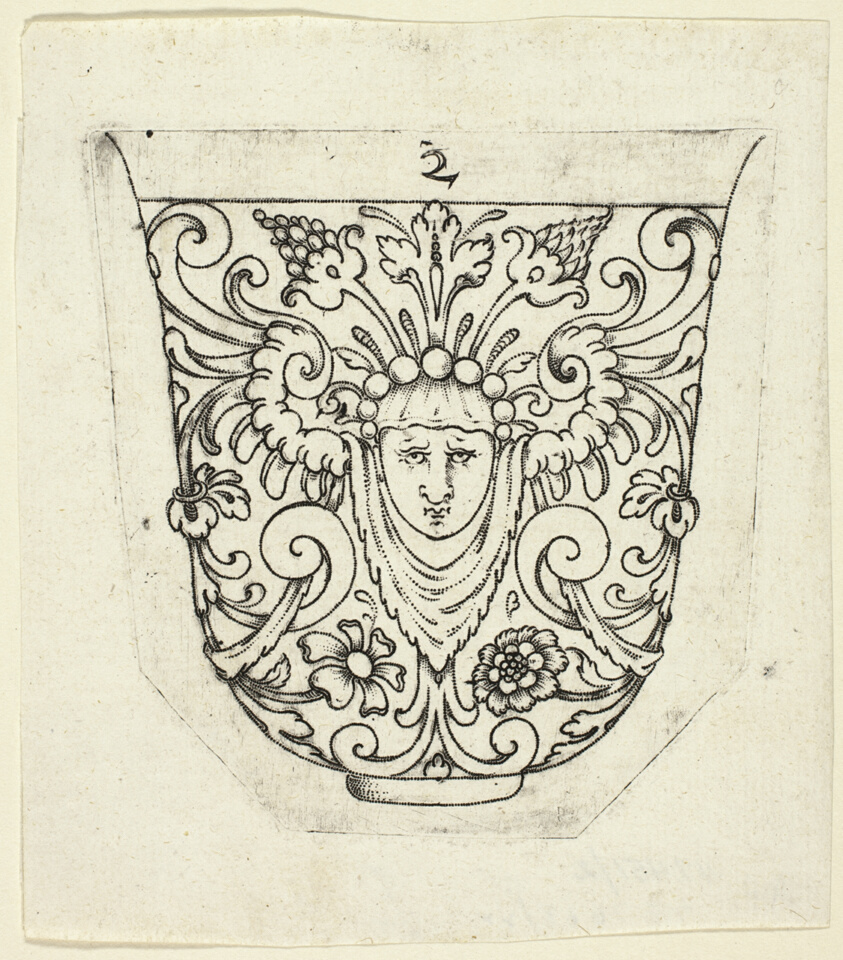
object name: Print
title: Plate 2, from twenty ornamental designs for goblets and beakers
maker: Master A.P. (German, active early 17th century)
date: 1604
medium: Punch engraving in black on ivory laid paper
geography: Germany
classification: engraving; print; prints and drawing